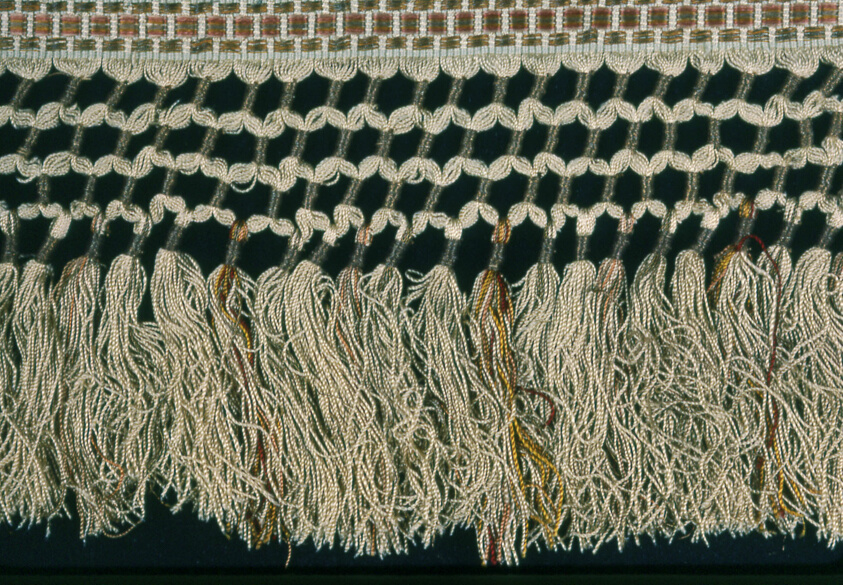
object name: Textile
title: Fringe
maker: France or Italy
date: 17th/18th century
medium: Silk and gold gilt strip wound around a silk fiber core, plain weave with supplementary patterning warps and extended ground weft cut fringe, grouped and wrapped with gold gilt strips wound around a silk fiber core; additional fringes wrapped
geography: France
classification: textile; weaving